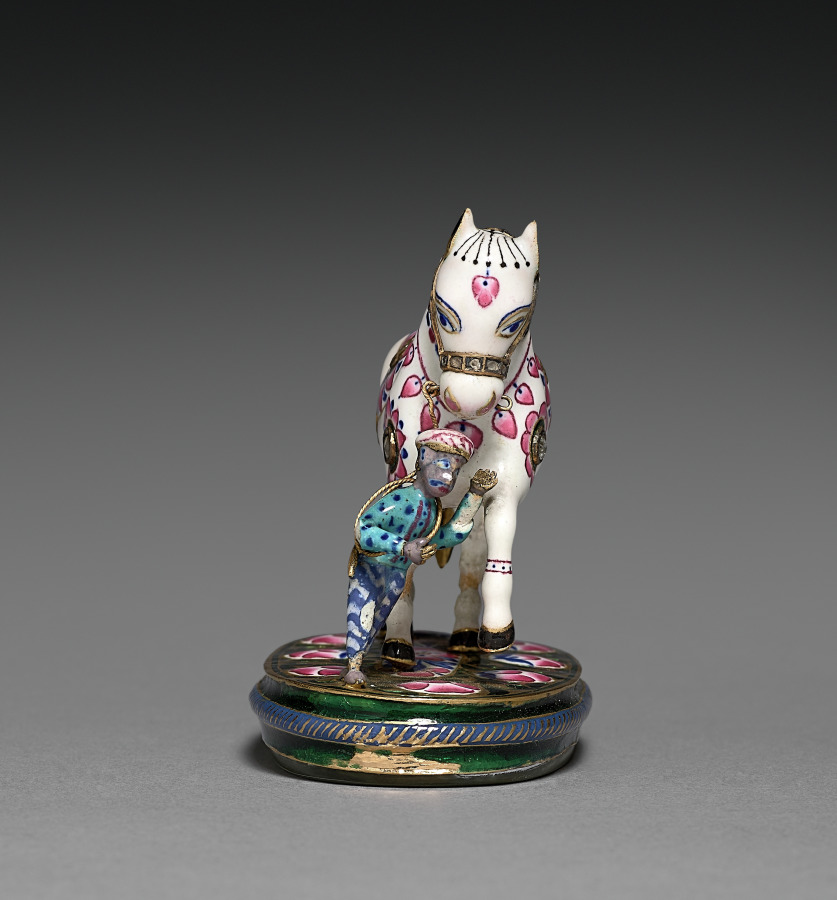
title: Ladies Hand Mirror with Horse as Handle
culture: India, Jaipur, late 18th-19th Century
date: late 1700s-1800s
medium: enamel inlaid with semi-precious stones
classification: Enamel